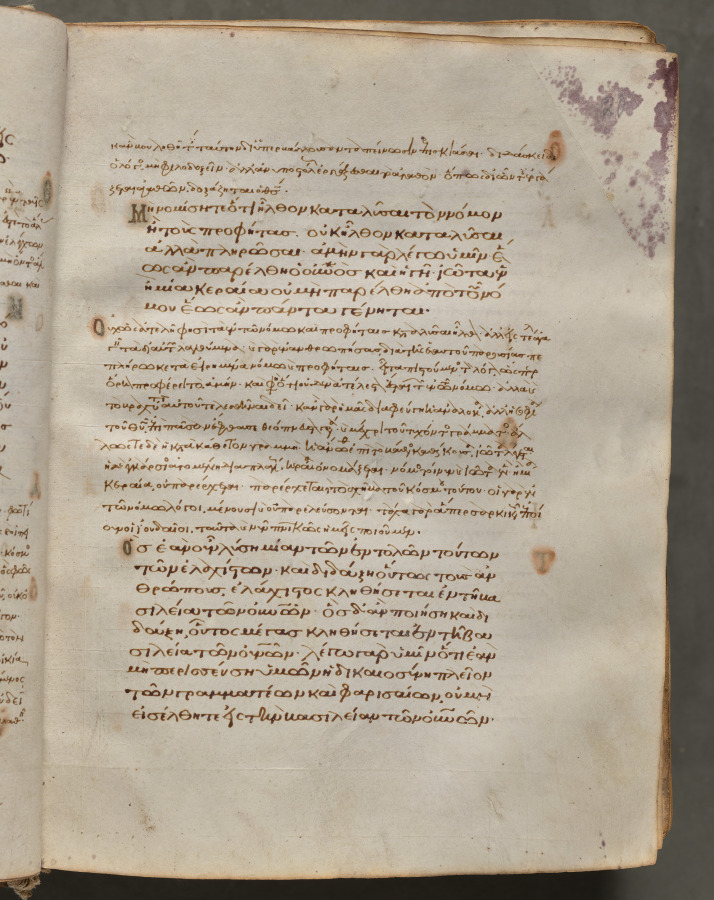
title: Text, folio 20 (recto), from a Gospel Book with Commentaries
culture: Byzantium, Constantinople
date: c. 1000–1100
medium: ink, tempera, and gold on vellum; leather binding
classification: Bound Volume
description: Each of the four gospels in this book opens on a page with brilliantly illuminated borders depicting the author of the text as well as birds-principally peacocks, symbols of the immortality of the soul-and fountains, representing the fountain of life and the salvation of the soul. This volume consists of 428 leaves with texts in Greek. Its level of sophistication suggests that it was probably written and decorated in a monastery in Constantinople.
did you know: Gospel Books were carried in procession through Byzantine churches.